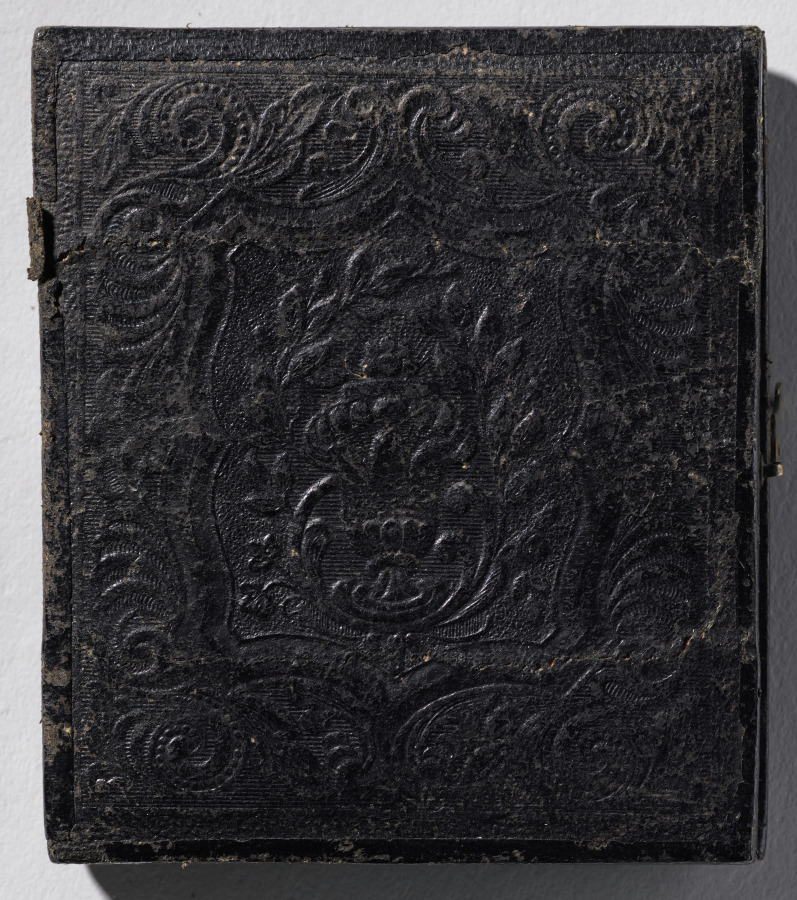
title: Two Oxen and Driver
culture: America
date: 1850s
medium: daguerreotype, sixth plate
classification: Photograph